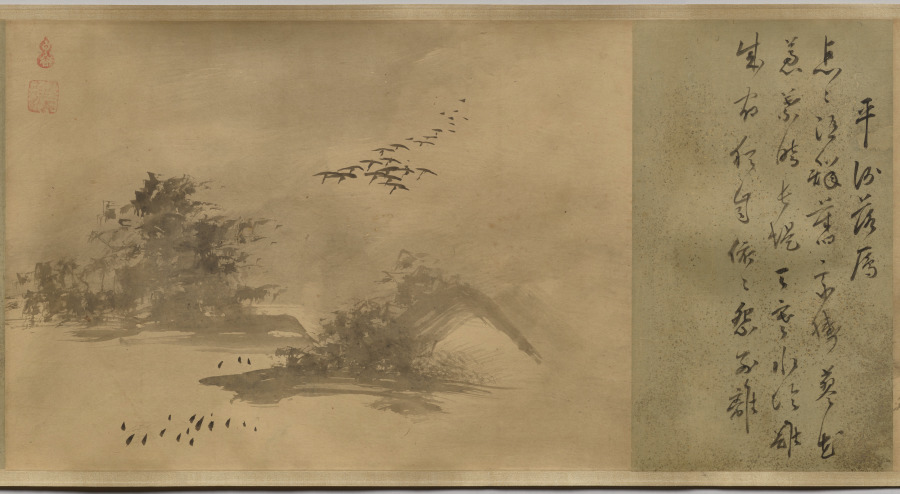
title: Poems and Pictures of the Eight Views of Xiao-Xiang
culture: Japan, Momoyama period (1573–1615)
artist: Unkoku Tōgan (Japanese, 1547–1618)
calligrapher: Inkei Gentetsu (Japanese, 1562–1612)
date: 1605–12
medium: Handscroll; ink on paper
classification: Painting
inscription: Each painting sealed with red gourd-shaped seal reading Unkoku (雲谷) and a square seal reading Tōgan (等顔).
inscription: Each painting prefaced with a titled poem on the Eight Views of Xiao-Xiang by Yujian Ruofen (active late 13th century) inscribed by Japanese Buddhist monk Inkei Gentetsu (1562–1612).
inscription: 右寫玉㵎之筆勢／雪舟末葉等顔筆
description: Unkoku Tōgan brushed these scenes using the splashed-ink technique associated in Japan with the Chinese monk Yujian Ruofen (active late 1200s). Xiao-Xiang refers to the region in present-day Hunan province, where the Xiang River and its tributaries converge. Each of the eight views evokes a time of day or season. The earliest surviving series of Xiao-Xiang paintings is by Wang Hong (active mid-1100s), but textual evidence tells us the theme appears earlier. It was later adopted in Japan and Korea, as seen here. The poems were inscribed by Inkei Gentetsu, the third abbot of the Rinzai Zen temple Tōshunji, Japan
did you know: The “Tō” of Tōgan comes from the name of painter Sesshū Tōyō (1420–1506).